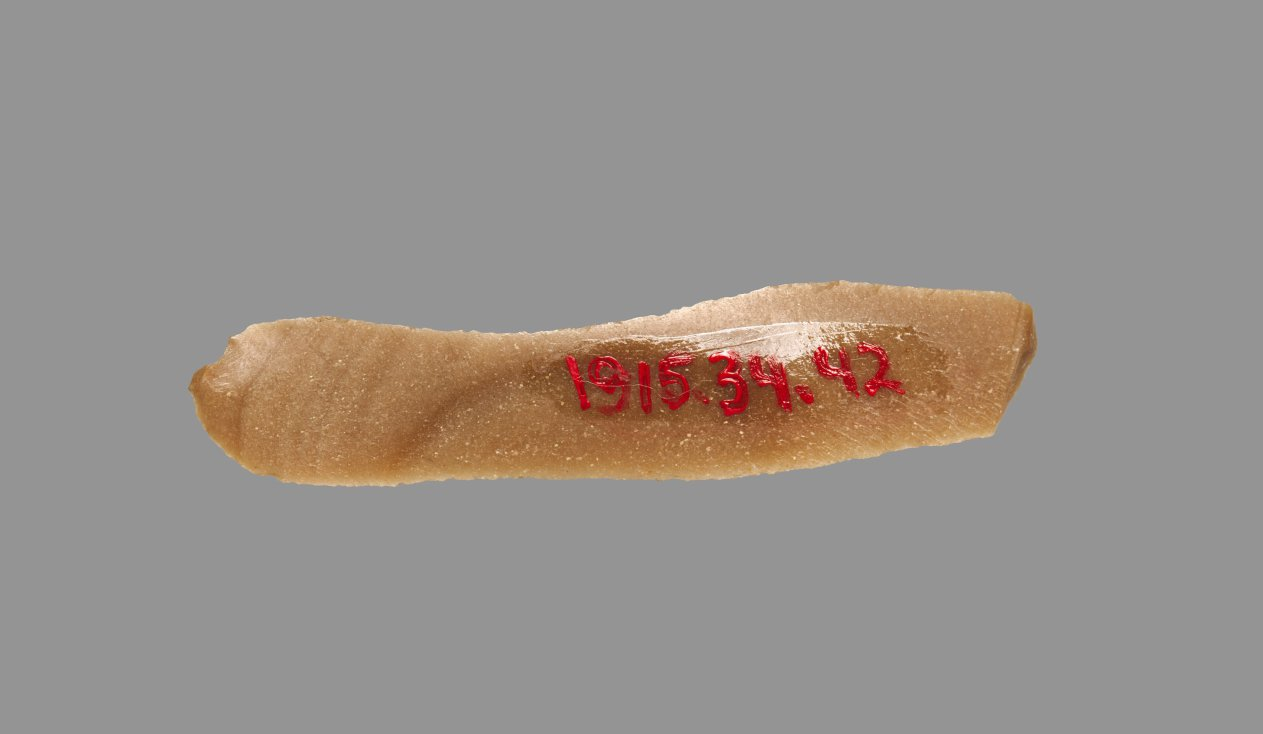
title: Sickle Blade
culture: Egypt, Middle Kingdom (2040–1648 BCE), Dynasty 12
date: 1980–1801 BCE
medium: flint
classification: Implements